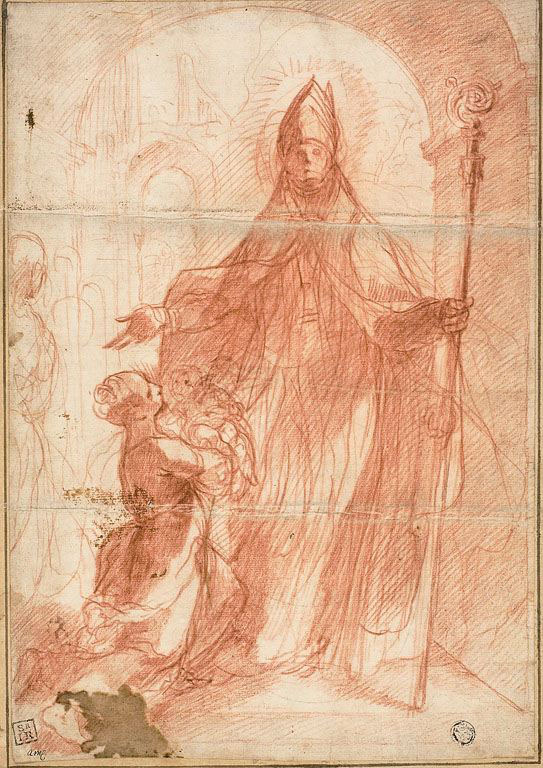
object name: Drawing and Watercolor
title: Bishop Saint Blessing a Mother and Child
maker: Attributed to Alessandro Casolani; Italian, 1552/53-1607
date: 1575/1600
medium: Red chalk, with traces of graphite, on ivory laid paper, laid down on ivory laid paper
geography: Italy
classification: chalk; drawings (visual works); prints and drawing